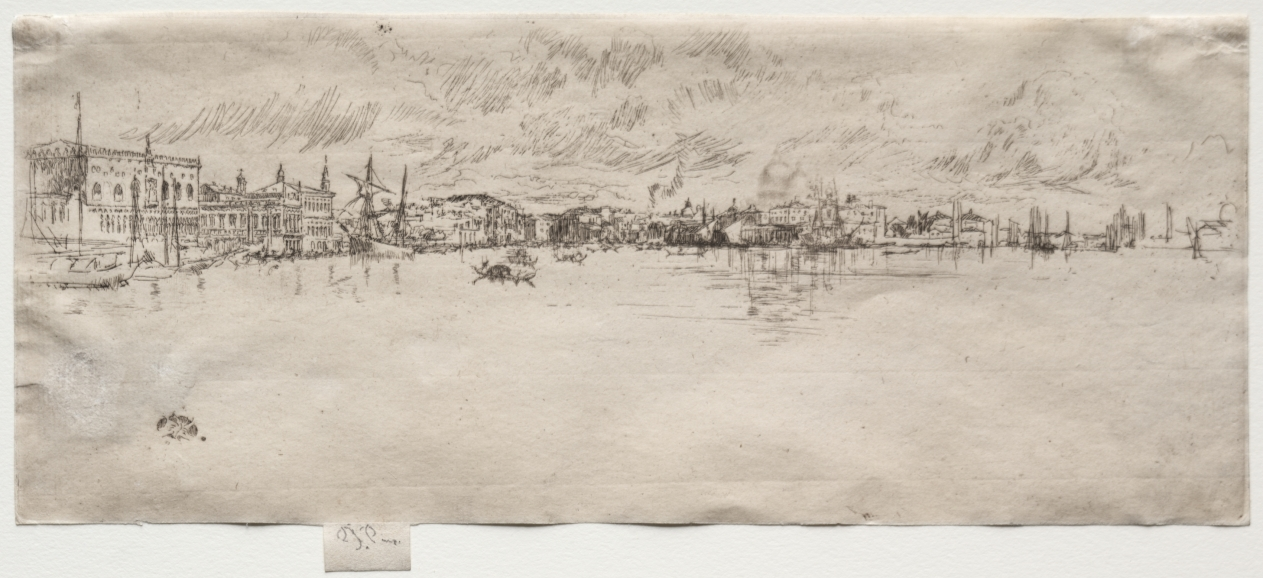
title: Long Venice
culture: America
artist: James McNeill Whistler (American, 1834–1903)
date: 1879–80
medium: etching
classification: Print